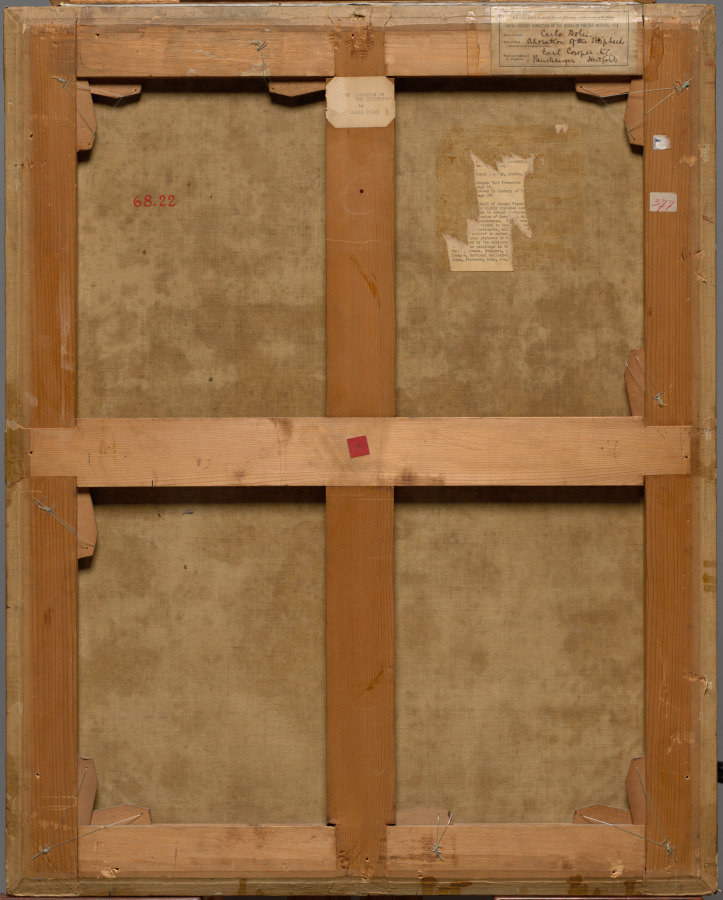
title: Adoration of the Shepherds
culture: Italy, 17th century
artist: Carlo Dolci (Italian, 1616–1687)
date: c. 1670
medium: oil on canvas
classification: Painting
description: The historical significance of the Baroque painter Carlo Dolci, a precocious artist whose skill was recognized early by the leading Florentine patrons of his time, is often diminished due to his traditionalist compositions. Having gained local reputation as a talented portraitist and painter of religious narrative, Dolci's anti-Mannerist technique dismissed many of the leading Baroque trends as superfluous, retaining an unobtrusive and placid style in the manner of those before him. Having been a devout follower of the brotherhood of St. Benedict, Dolci draws upon a strict Christian iconography in his depiction of the shepherds' witness account of the birth of Christ. --Charles Eppley (January 2009)